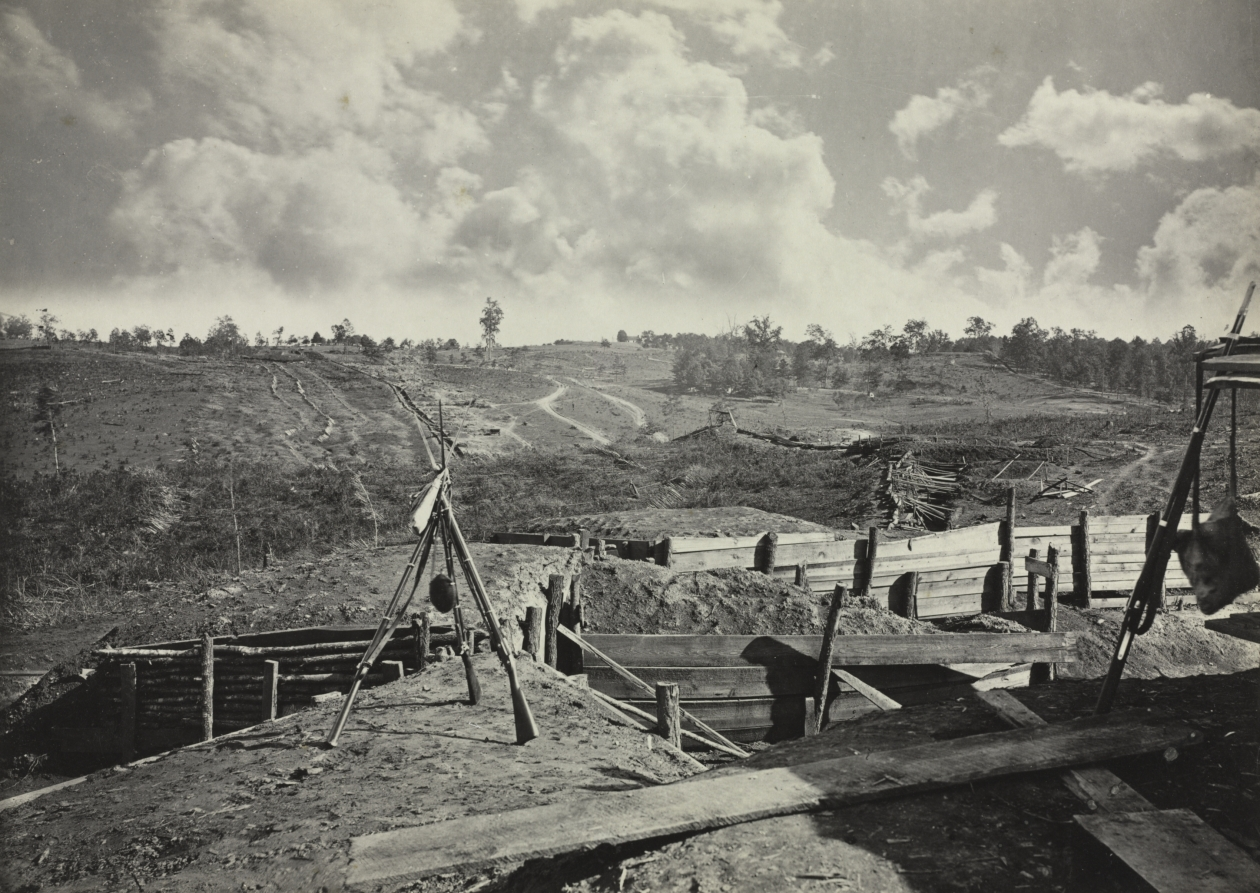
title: Rebel Works in front of Atlanta, Georgia, No. 5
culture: America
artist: George N. Barnard (American, 1819–1902)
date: 1865–1866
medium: albumen print from wet collodion negative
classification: Photograph